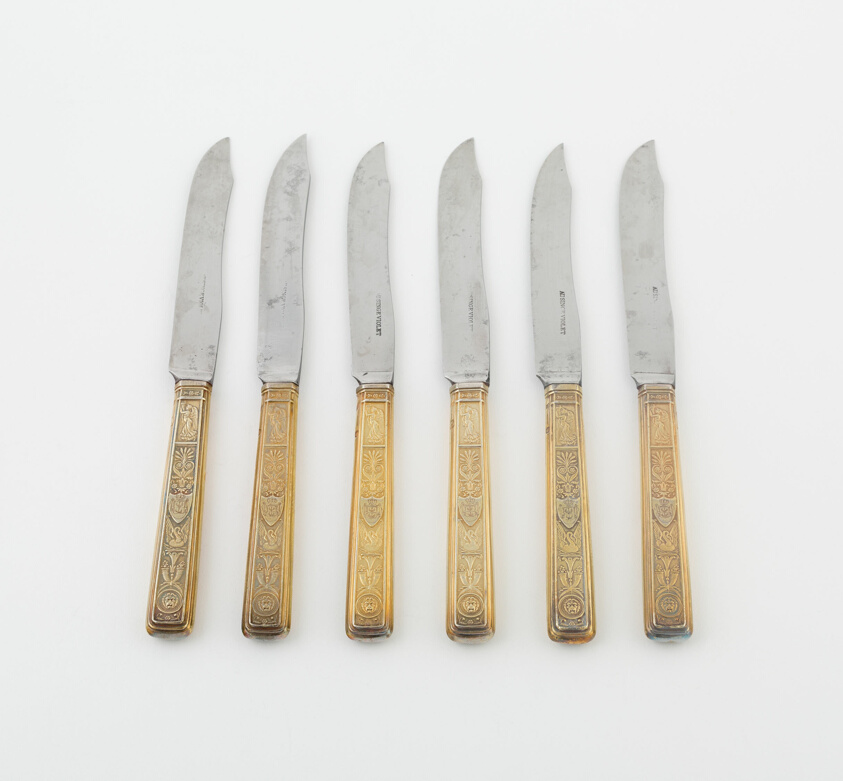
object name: Metalwork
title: Set of Dessert Knives (10)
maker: Martin-Guillaume Biennais; French, 1764–1843; Pierre-Benoît Lorillon; French, 1757–1816; Paris, France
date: 1789–1820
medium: Silver gilt and steel blades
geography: Paris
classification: silver; metalwork; european decorative arts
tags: Borghese Service